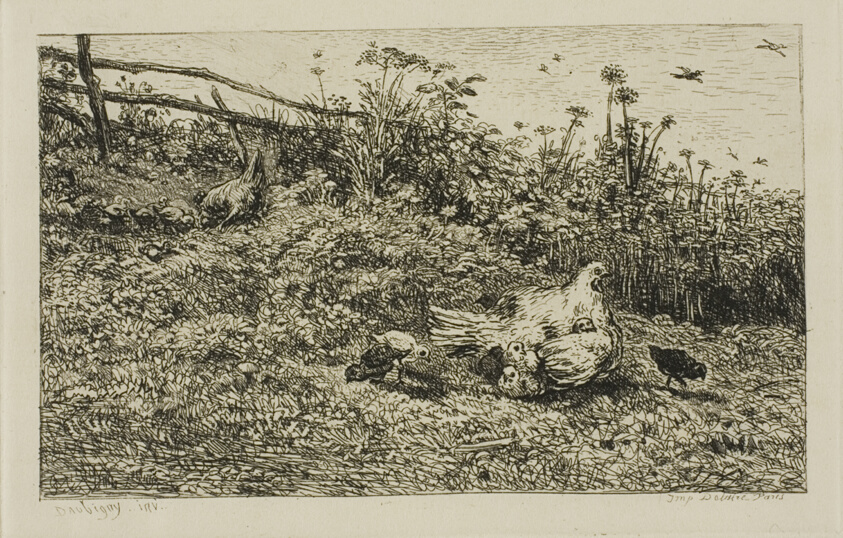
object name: Print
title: The Hen and her Chicks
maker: Charles François Daubigny (French, 1817-1878)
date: c. 1860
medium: Etching on cream Japanese paper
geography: France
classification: etching; print; prints and drawing